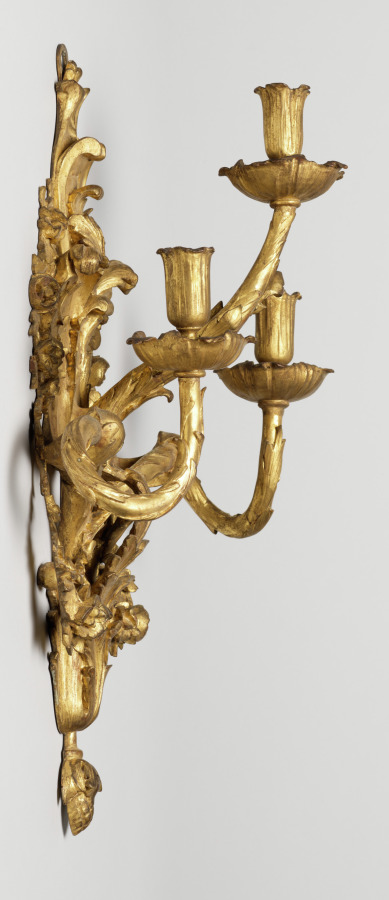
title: Candle Bracket (1 of 2)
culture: France, Transitional Style, Louis XV to Louis XVI, 18th century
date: c. 1765–1775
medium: gilded wood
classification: Furniture and woodwork